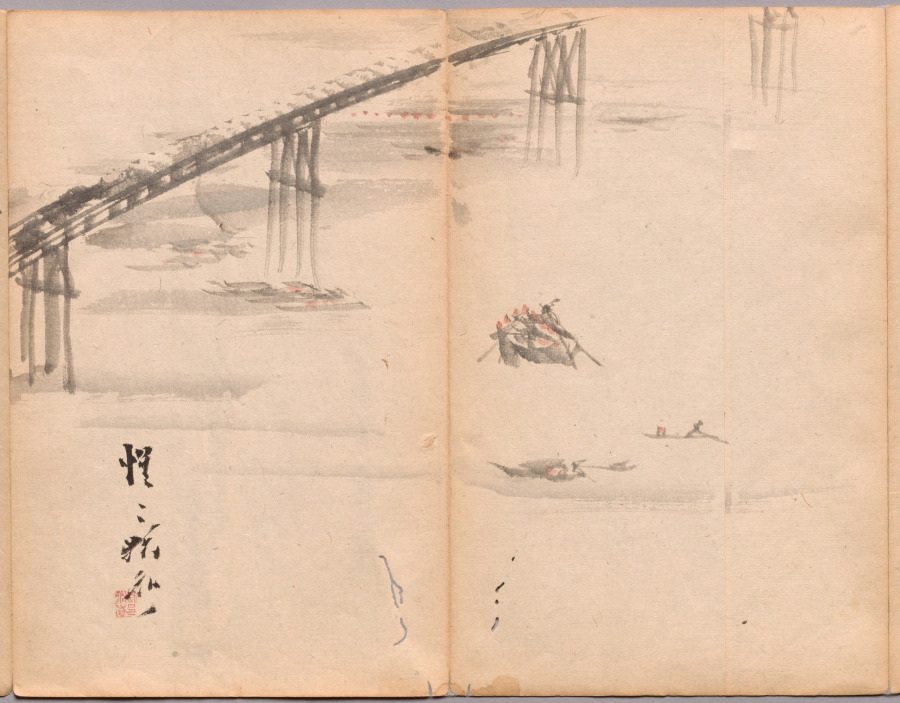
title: Boats on a River from Sketch Album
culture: Japan, Edo period (1615–1868) to Meiji period (1868–1912)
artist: Kawanabe Kyōsai (Japanese, 1831–1889)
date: mid- to late 1800s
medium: Accordion-style book of 26 double-leaves; ink and color on paper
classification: Bound Volume